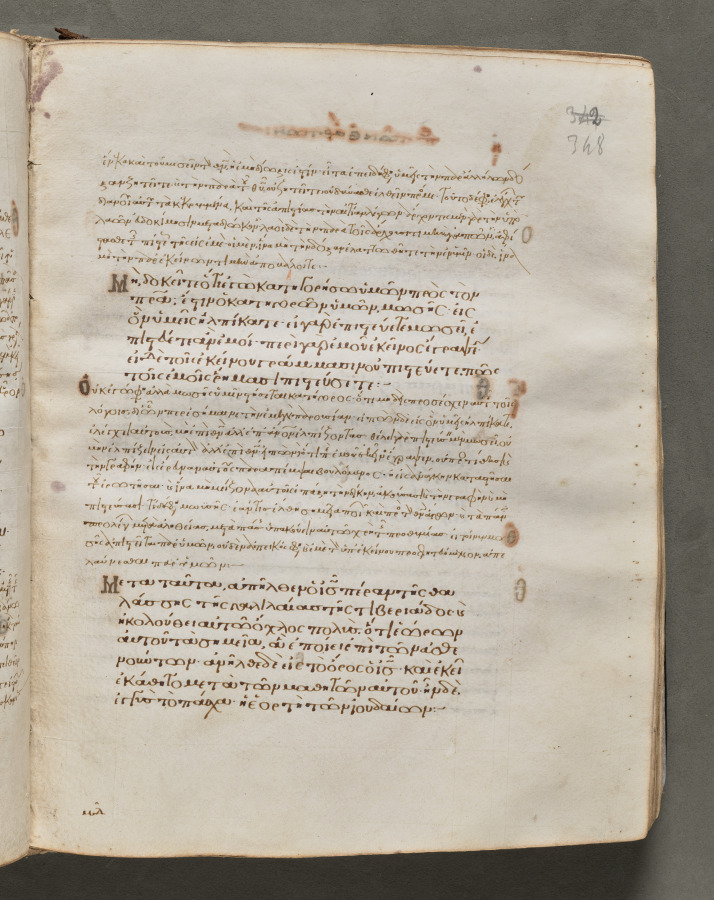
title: Text, folio 348 (recto), from a Gospel Book with Commentaries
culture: Byzantium, Constantinople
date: c. 1000–1100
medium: ink, tempera, and gold on vellum; leather binding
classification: Bound Volume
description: Each of the four gospels in this book opens on a page with brilliantly illuminated borders depicting the author of the text as well as birds—principally peacocks, symbols of the immortality of the soul—and fountains, representing the fountain of life and the salvation of the soul. This volume consists of 428 leaves with texts in Greek. Its level of sophistication suggests that it was probably written and decorated in a monastery in Constantinople.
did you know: Gospel books were carried in procession through Byzantine churches.